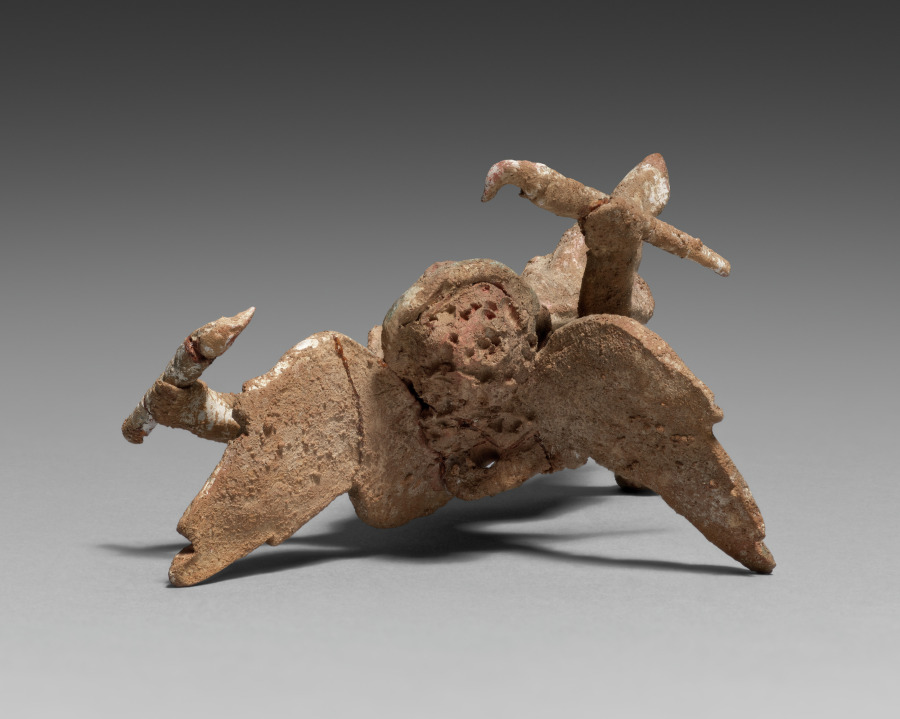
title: Figurine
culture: Greece, Myrina, Hellenistic Period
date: 300–100 BCE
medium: terracotta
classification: Sculpture